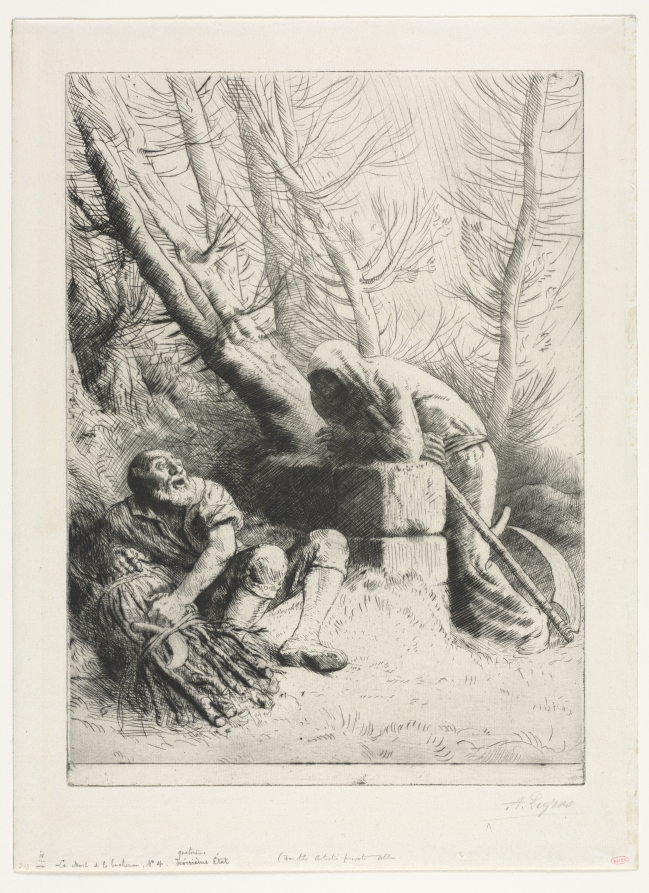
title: Death and the Woodcutter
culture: France, 19th century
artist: Alphonse Legros (French, 1837–1911)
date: 1881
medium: drypoint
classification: Print